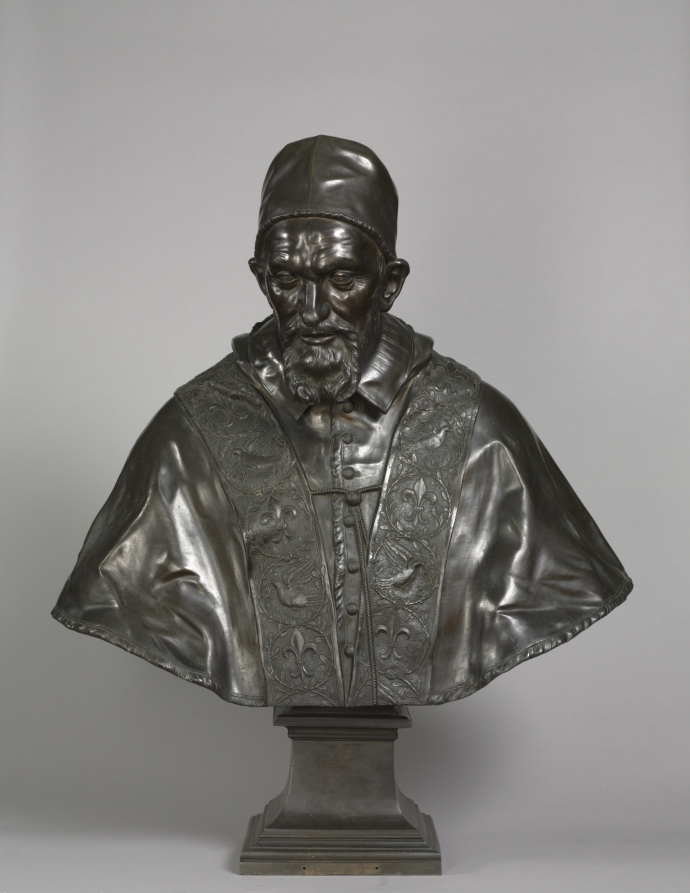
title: Portrait of Pope Innocent X Pamphili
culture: Italy, 17th century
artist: Alessandro Algardi (Italian, 1598–1654)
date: designed 1647–48; cast 1650–1700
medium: bronze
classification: Sculpture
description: Innocent X (Giovanni Battista Pamphili) was pope from 1644 until his death in 1655. Although he was not very interested in the visual arts, he followed tradition and gave several papal commissions for artistic projects. Algardi was the sculptor most frequently called upon by Innocent X. This sensitive portrait captures many details of the pope's costume as well as his intelligent, quiet face.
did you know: The pope's stole features Pamphili family emblems: fleur-de-lis and doves encircled by olive leaves.